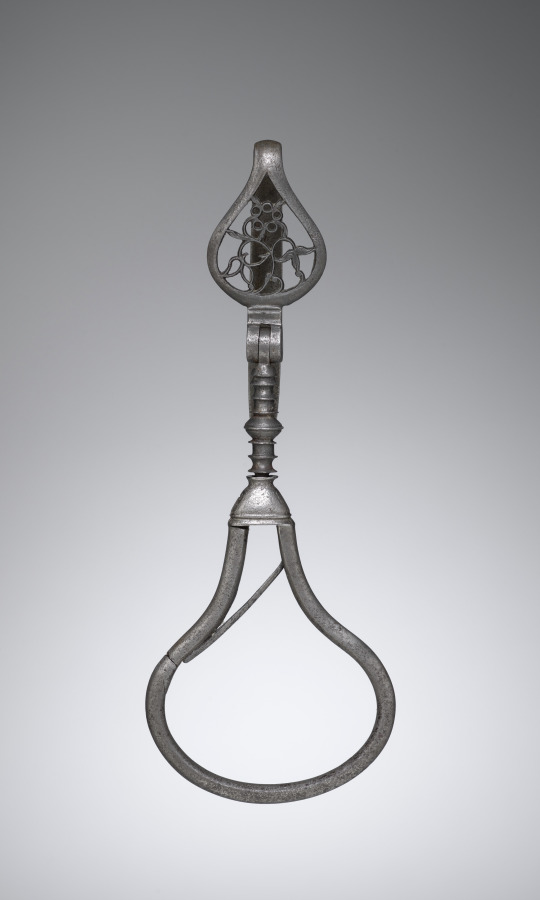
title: Carbine Hanger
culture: Italy, 17th century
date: 1600s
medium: steel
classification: Arms and Armor